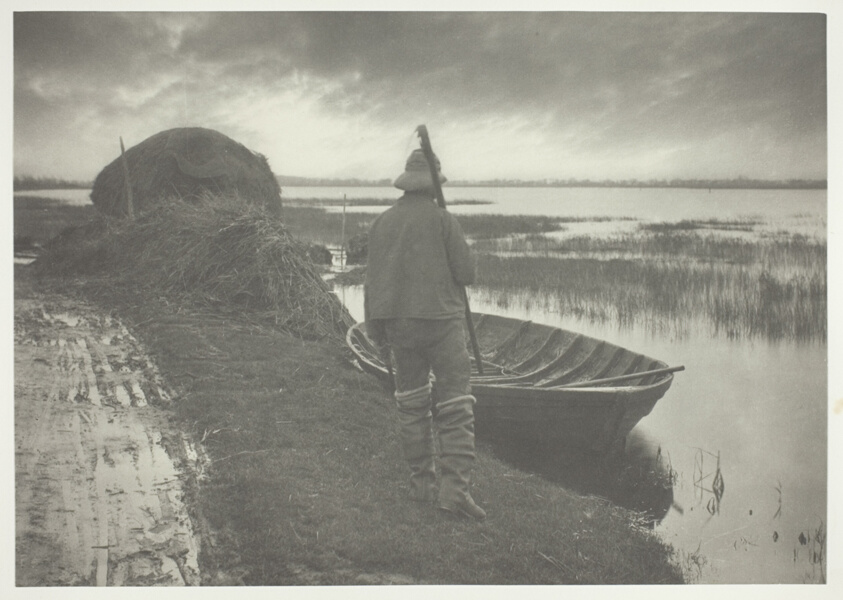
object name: Photograph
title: Marshman Going to Cut Schoof-Stuff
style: 19th century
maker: Peter Henry Emerson (English, born Cuba, 1856–1936)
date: 1886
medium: Platinum print, pl. XXII from the album "Life and Landscape on the Norfolk Broads" (1886)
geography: England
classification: platinum print; photographic process; photography; photograph